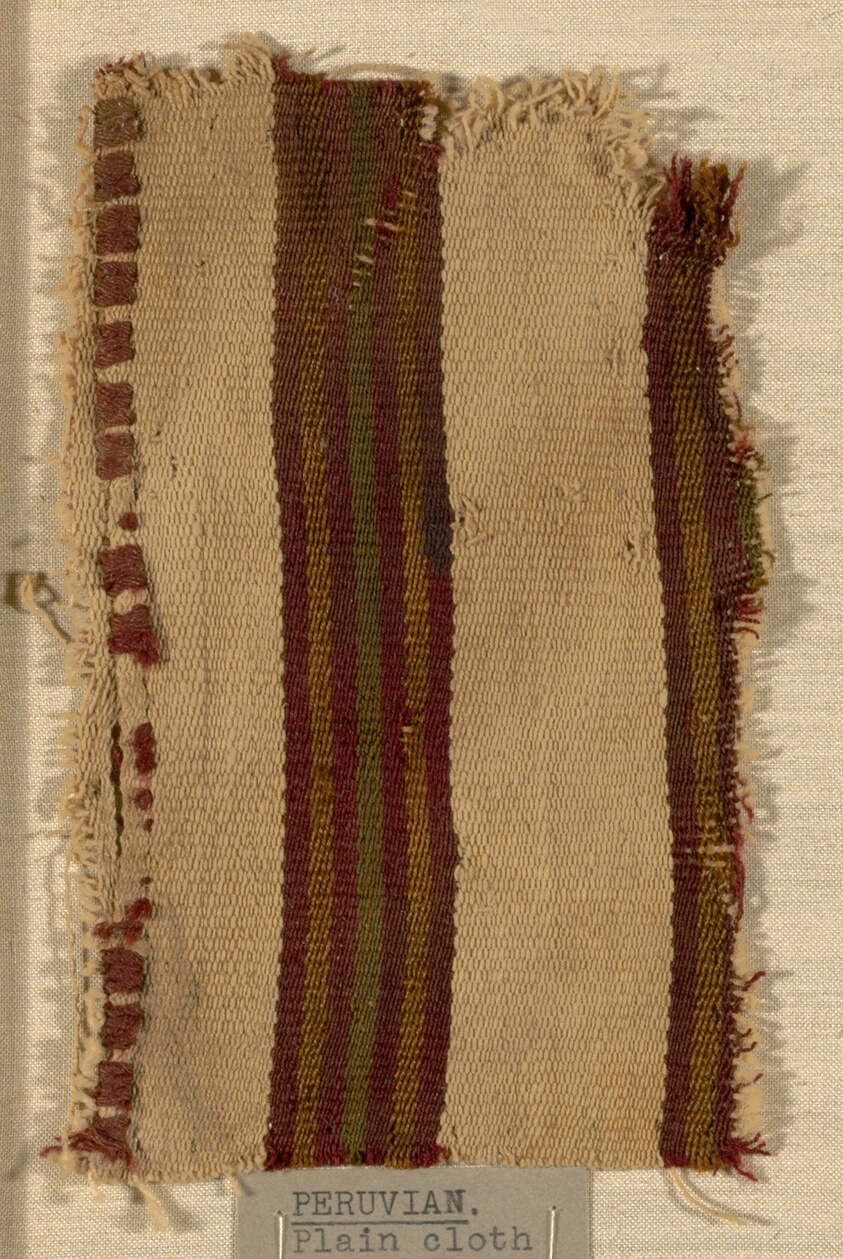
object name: Textile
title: Fragment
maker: Peru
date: 1–1532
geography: Peru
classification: textile; weaving